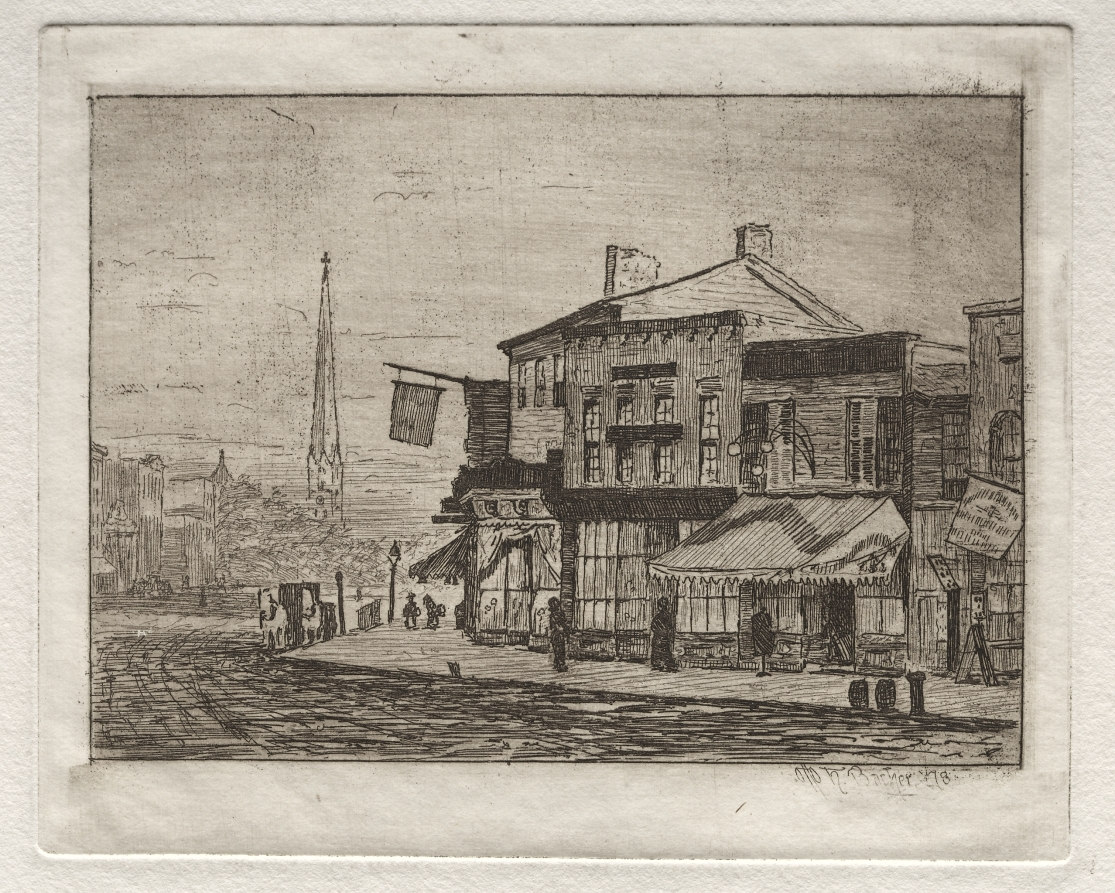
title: Cleveland, Woodland Avenue and Eagle Street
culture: America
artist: Otto H. Bacher (American, 1856–1909)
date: 1878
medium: etching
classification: Print